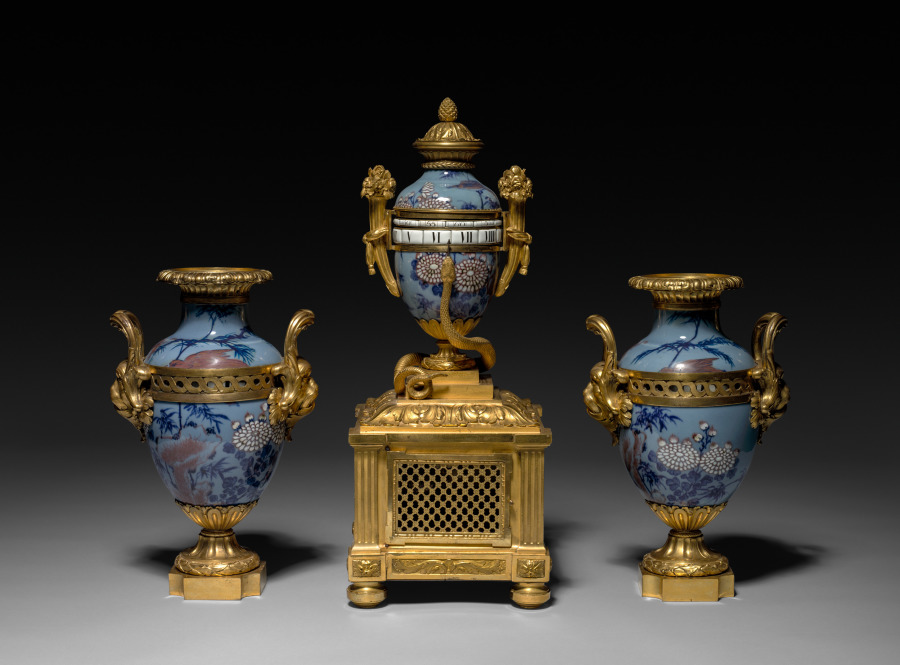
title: Garniture Set (one clock and 2 vases)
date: 1736–1770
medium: Chinese hard-paste porcelain, gilt bronze, enameled metal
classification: Furniture and woodwork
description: The fascination with Chinese porcelain among aristocratic circles increased during the reign of Louis XV. In reaction to the perceived excesses of elaborate naturalistic ornament of the 1750s, mount makers increasingly turned to neoclassical designs, known as Goût Grec (Greek taste) in the 1760s and 1770s. These beautifully chased gilt-bronze mounts feature classical Greco-Roman motifs such as lion masks, acanthus and laurel leaves, and pilasters.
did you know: A set of vases and clock, connected visually by the use of the same materials, often adorned a mantlepiece or the top of a large piece of furniture, such as a commode or console, within a room.